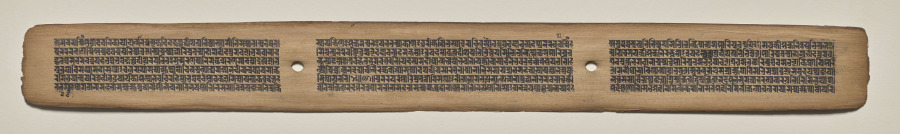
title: Text, Folio 110 (recto), from a Manuscript of the Perfection of Wisdom in Eight Thousand Lines (Ashtasahasrika Prajnaparamita-sutra)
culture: Eastern India, Bihar, Vikramashila Monastery. Painting: Nepal, Kathmandu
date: Sunday, September 14, 1119 (year 239 of the Newar Samvat in the month of Ashvina)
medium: gum tempera and ink on palm leaves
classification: Painting